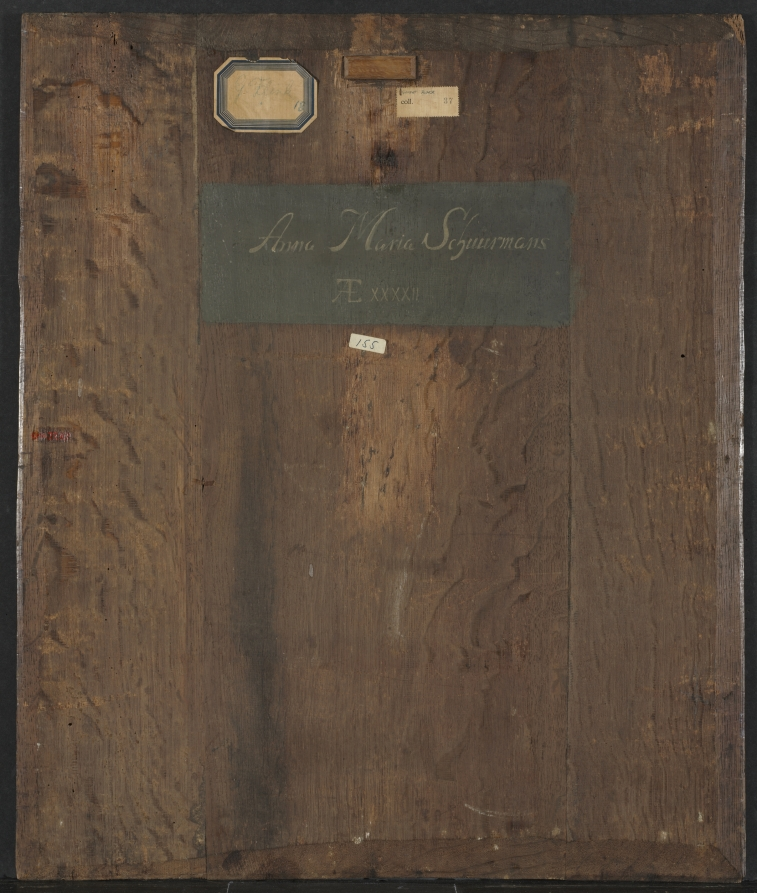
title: Portrait of a Woman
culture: Netherlands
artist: Govaert Flinck (Dutch, 1615–1660)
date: 1646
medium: oil on wood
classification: Painting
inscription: Signed left: "G. Flinck 1646"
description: Because of an inscription on the back, this painting was long considered a portrait of Anna Maria van Schurman, a prominent Dutch scholar and artist. These words, however, were added much later and incorrectly state that Anna Maria was 42 years old, when in reality she would have been 39. Furthermore, Flinck's likeness does not resemble other known portraits of this famous woman. Although her identity remains unknown, his sitter has an austere dignity and emotional complexity that captures her individuality through the careful description of her expression and dress. Due to this naturalism and elegant formality, Flinck achieved wealth and a high social standing throughout the 1640s as one of Amsterdam's most popular portraitists, rivaling his former master, Rembrandt. Joachim Sandrart, a contemporary German painter, once commented that compared to Rembrandt's portraits, Flinck's "were more felicitous in the exactness and in the pleasing quality of the portrayal."